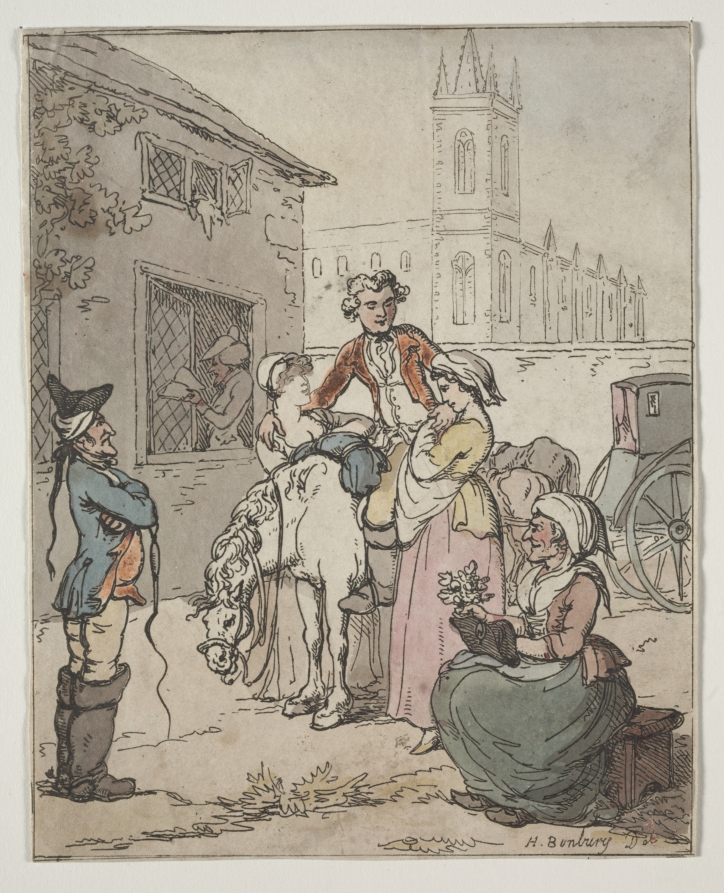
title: Scene Outside an Inn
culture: England, 18th century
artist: Henry William Bunbury (British, 1750–1811)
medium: etching, hand colored with watercolor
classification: Print